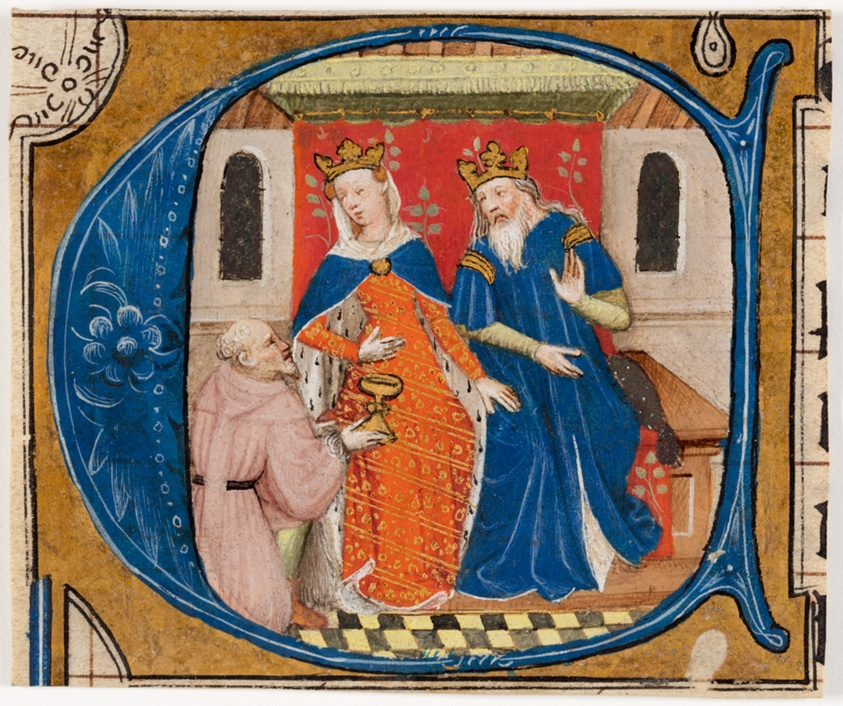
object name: Drawing and Watercolor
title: Nehemiah before King Artaxerxes, initial ‘C’ from a Bible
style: medieval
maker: Masters of Zweder van Culemborg; Northern Netherlandish (Utrecht), about 1415-1440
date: about 1430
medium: Opaque watercolor, gold leaf, mordant gilding, and pen and black ink, with touches of pen and brown ink (recto), and pen and black ink, with touches of red opaque watercolor and pen and brown ink (verso), on parchment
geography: Netherlands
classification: watercolor; manuscript; prints and drawing